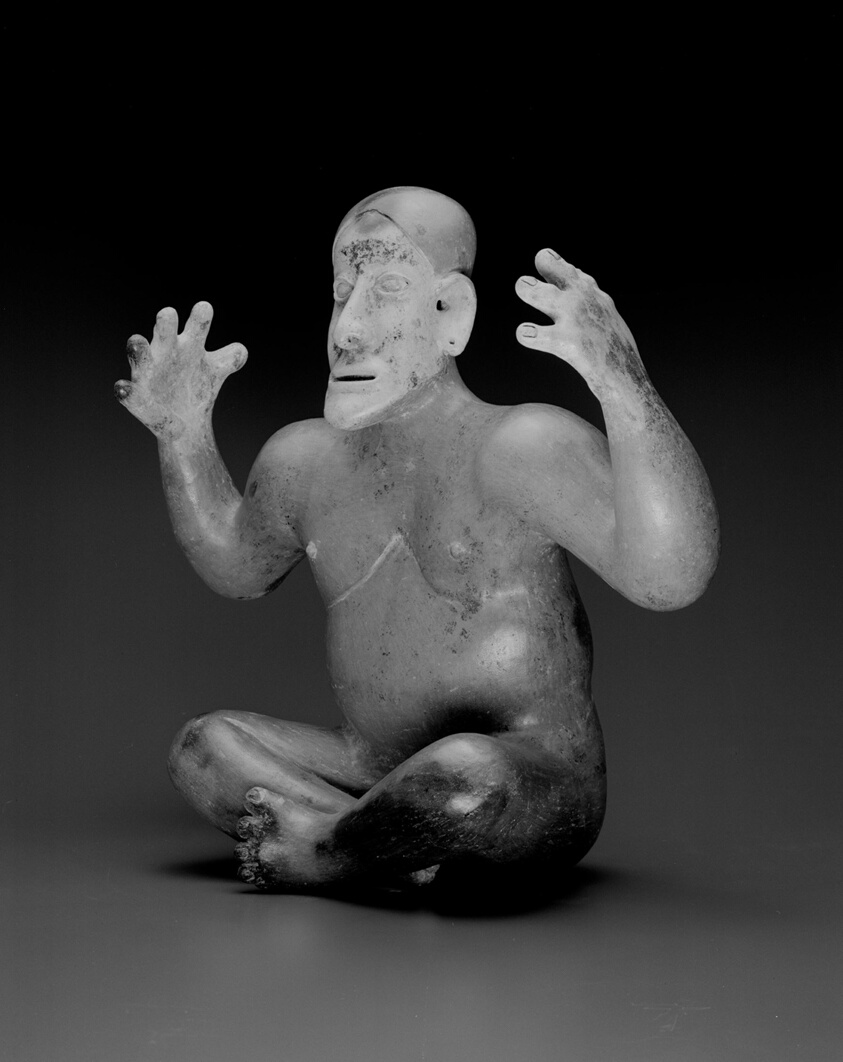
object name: Sculpture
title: Storyteller Figure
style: jalisco, ameca-zacoalco, mesoamerican, Pre-Columbian, americas, west mexico, ameca, Arts of the Americas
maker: Jalisco (Ameca Valley, Jalisco, Mexico)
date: 100–800 CE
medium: Ceramic and pigment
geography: Jalisco state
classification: ceramics; earthenware; sculpture; art of the americas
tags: people, ancestors, gestural, leaders